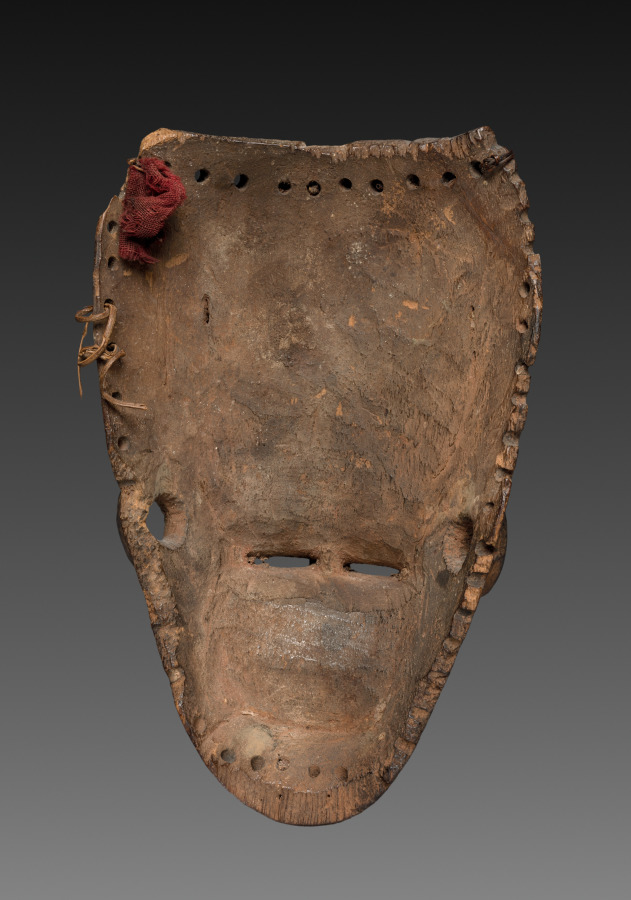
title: Face Mask (Agboho mmuo)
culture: Africa, West Africa, Nigeria, Igbo-style maker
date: possibly early 1900s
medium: Wood, pigment, plant fiber, and cotton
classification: Mask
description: This small face mask would have been complemented by a separate, elaborate superstructure covered with cotton cloth. Though always worn by a man, the image glorifies youthful female beauty. Derived from chalky clay, the white coloration of the face refers to ancestral spirits whose powers the mask evokes. The masks dance in festivals that generally celebrate the dead but also appear at funerals to escort the deceased to the land of the ancestors.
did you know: Though always worn by a man, the imagery of this mask celebrates youthful female beauty.